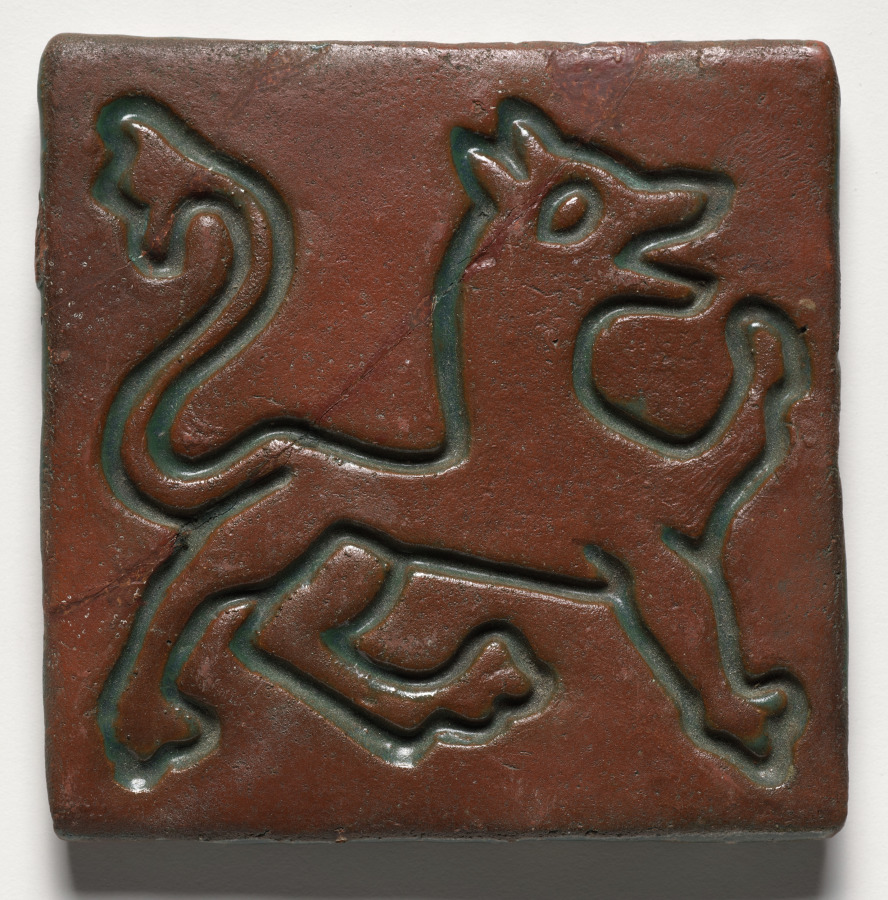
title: Tile- Dog of Nuremberg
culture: America, Pennsylvania, Doylestown, Early 20th century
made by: Moravian Pottery and Tile Works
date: before 1921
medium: glazed ceramic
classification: Ceramic